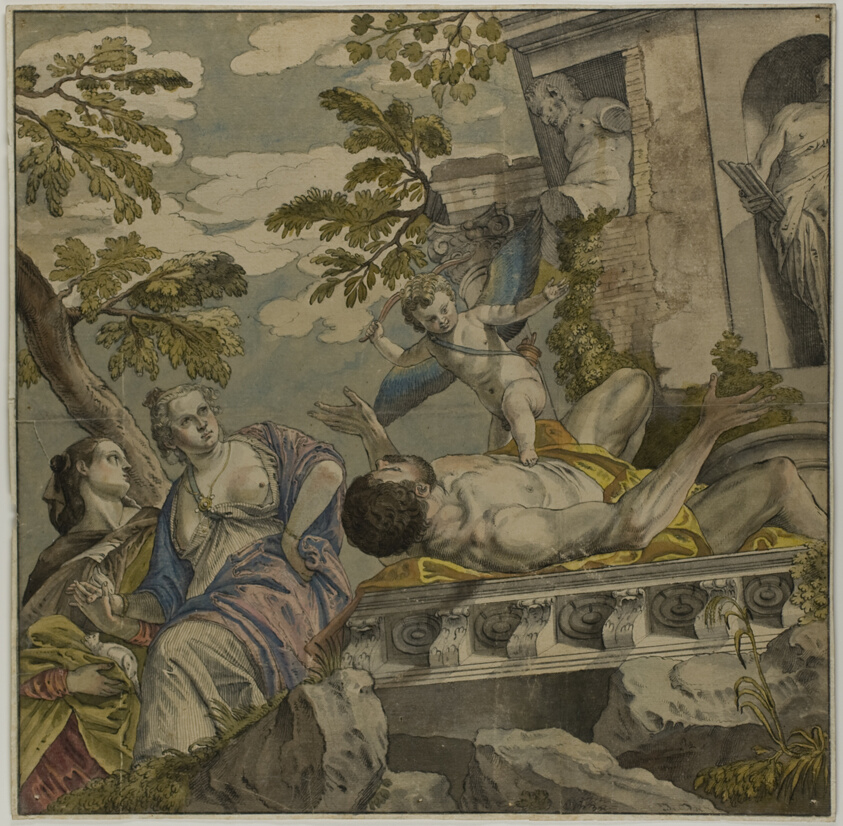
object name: Drawing and Watercolor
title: Allegory of Love: Scorn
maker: after Paolo Caliari, called Veronese; Italian, 1528-1588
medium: Pen and black ink, with brush and watercolor and gouache, over graphite, on cream wove paper, laid down on ivory wove paper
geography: Italy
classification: watercolor; drawings (visual works); prints and drawing